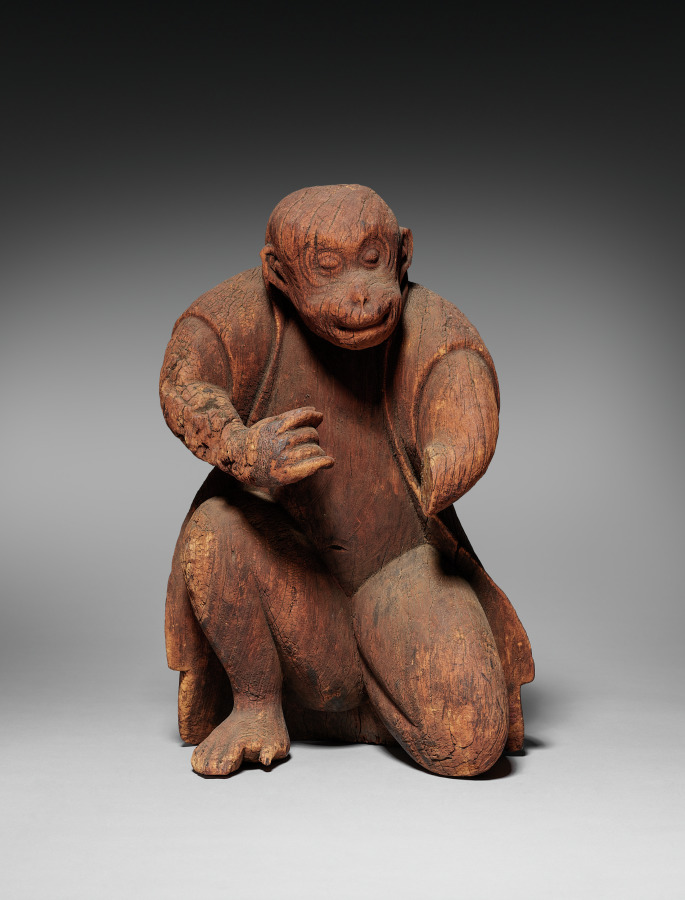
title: Monkey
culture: Japan, Edo period (1615–1868)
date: possibly 1700s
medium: wood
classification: Sculpture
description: Watching monkeys perform was once a popular form of street entertainment in Japan. Monkeys were outfitted with costumes and learned to perform dances and tricks. Monkeys also serve as the messengers of certain kami, or deities, and pairs of clothed monkey sculptures in wood or stone may be found on either side of the entrance of some jinja, or shrines dedicated to kami. This monkey has a jacket and may have once held bells and a fan. Unfortunately, its original identity and purpose have been lost.